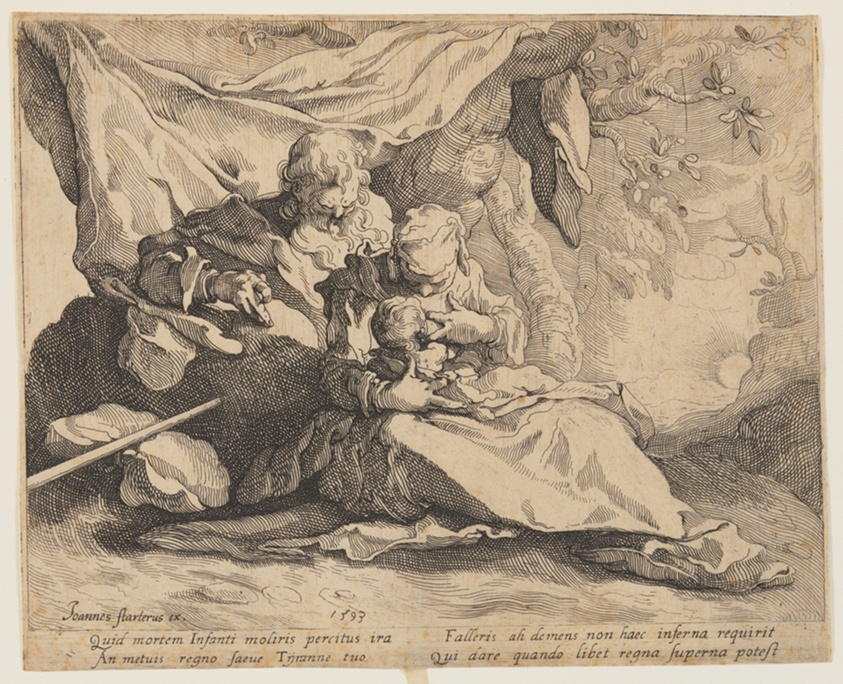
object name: Print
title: The Rest on the Flight to Egypt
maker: Gerrit Pietersz. Sweelink; Dutch, 1566–before 1612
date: 1593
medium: Etching on ivory laid paper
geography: Netherlands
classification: print; paper; prints and drawing; etching